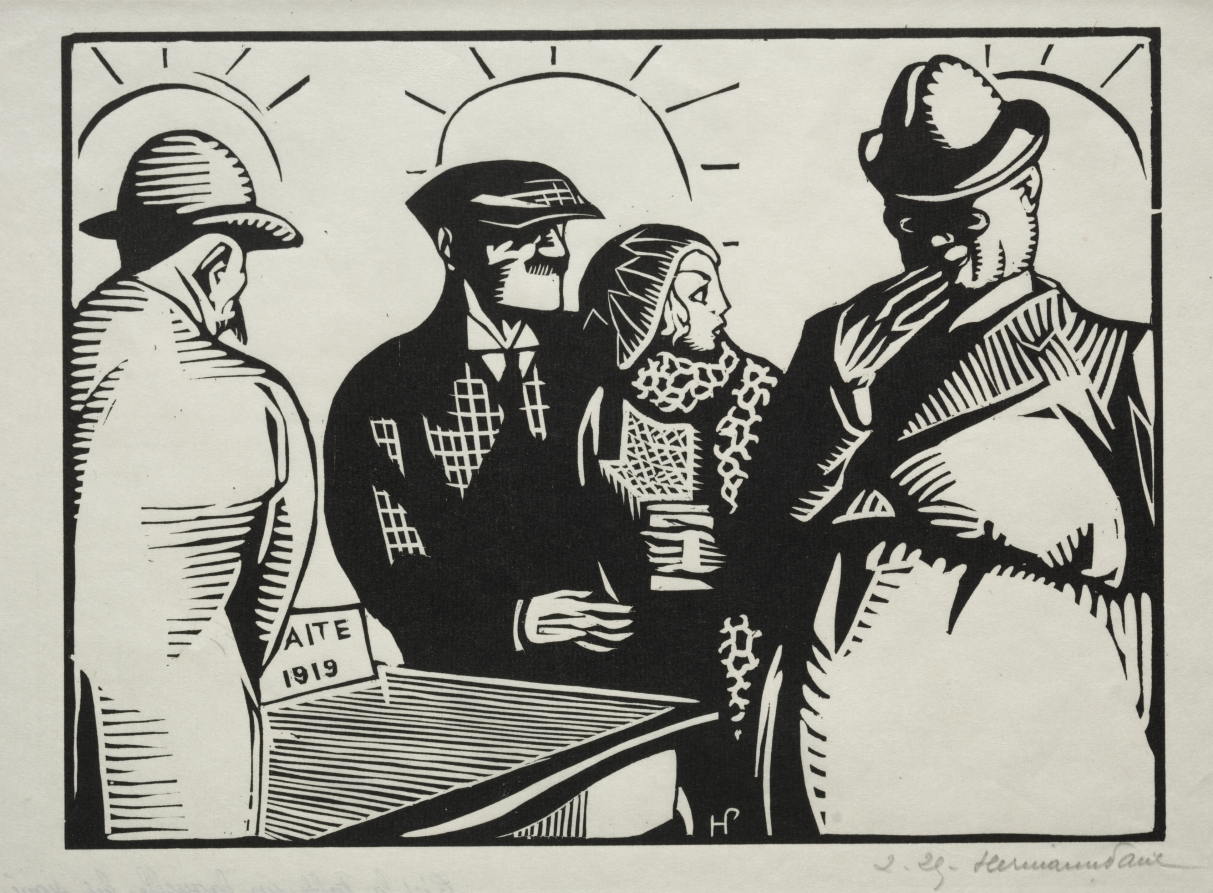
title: It is the Table on Which the Treaty of Versailles was Signed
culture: France, 20th century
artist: Hermann Paul (French, 1864–1940)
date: 1919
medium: woodcut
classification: Print